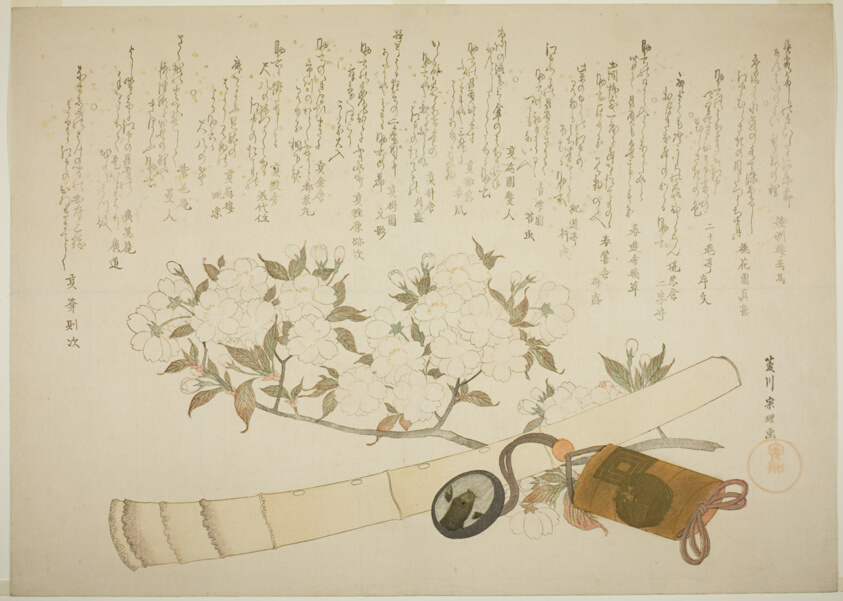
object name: Print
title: A Branch of White Peach Blossom, an Inro case, and a Hotchiku Flute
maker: Hishikawa Sori 菱川宗理; Japanese, active about 1789–1818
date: early 19th century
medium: Color woodblock print; surimono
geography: Japan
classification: woodblock print; print; asian art